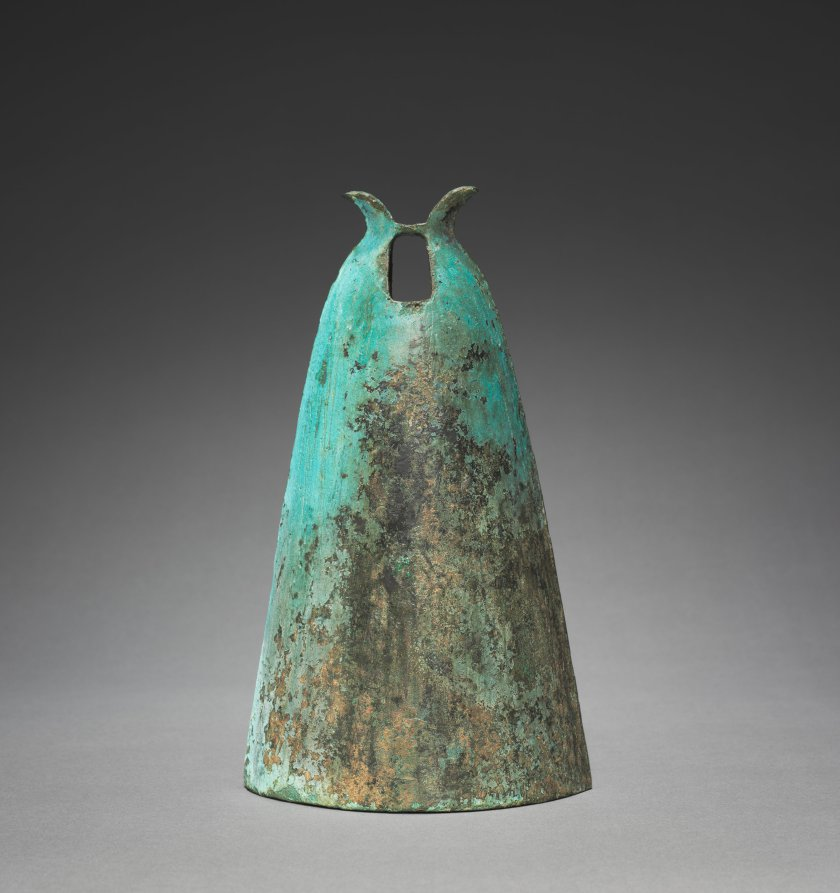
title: Bell with Diamond-Shaped Insignia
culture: China, along the southern borders, Eastern Zhou dynasty (770–256 BCE) to Han dynasty (202 BCE–220 CE)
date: 300s–100s BCE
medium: bronze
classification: Metalwork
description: These rare, elegant bronze bells were made in a tribal village along the southern borders of China. They differ greatly from bells made in the central regions, which often come in large sets and in varying sizes, and feature complex decorative patterns. The distinctive shape of these bells resembles a tall helmet topped by a pair of horns. A rope may have been tied around the horns so that the bells could be suspended. Each bell is decorated with a diamond-shaped insignia—probably to mark tribal affiliation. Although the bells are identical in size, each produces a different tone, which indicates that their casting was a highly refined process.